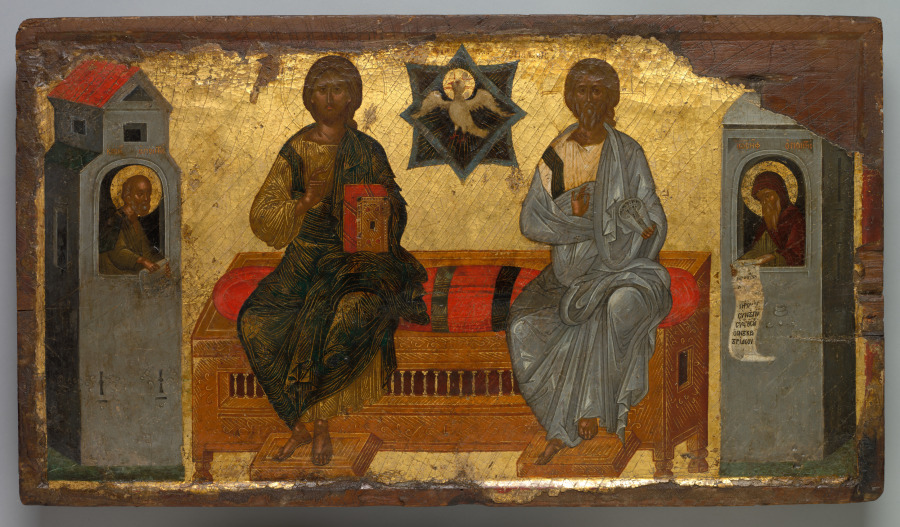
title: Icon of the New Testament Trinity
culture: Byzantium, Constantinople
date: c. 1450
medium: Tempera and gold on wood panel (poplar)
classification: Painting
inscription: Ο ΠΑΛΑΙΟC ΤΗΩ- God the Father as Christ in old age on right identified on either side of his head in gold, outlined in red.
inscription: ΤΟ ΑΙΟΝ ΠΝΑ- The Holy Spirit, identified by dove in gold outlined in red.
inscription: ΙΩCHΦ Ο ΠΟΙΗΤΗC- St. Joseph the Hymnographer identified on the left by gold letters, outlined in red.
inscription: ΚΟCΜ Ο ΠΟΙΗΤΗC- St. Kosmas the Hymnopgrapher identified on the right in gold letters in red outline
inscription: "'together with...you my God' and 'your dominion" in Scroll of Kosmas on the right.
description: This icon depicts an important subject in Orthodox Christian art, the three corresponding figures of the single godhead known as the Holy Trinity. The Trinity is represented here in a composition known as the “New Testament Trinity,” which features Christ and God the Father seated on a bench with a dove representing the Holy Spirit between them. The central field is occupied by a large wooden throne with gold highlights on which Christ (left) and the Ancient of the Days (God the Father as Christ in old age) are seated. The Holy Spirit, in the form of a dove, hovers within an eight-pointed star that signifies the eighth day, the future eon. On either side of the Trinity are two hymnographers, authors of hymns of praise, both identified by gold letters outlined in red—Saint Kosmas (about 675–752) on the left and Saint Joseph (about 812/818–about 886) on the right. They both suspend scrolls from round-arched windows. The icon likely was part of a church templon, the barrier that separated the nave from the sanctuary in an Orthodox church. It is not signed or dated; however, careful analysis of the painting’s style and technique places it in Constantinople around 1450, just prior to the city’s fall to the Ottomans in 1453. It represents a moment when Byzantine painting reached a brilliant crescendo.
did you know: More than just a breakfast food, eggs are used to make the tempera paint used in this painting.